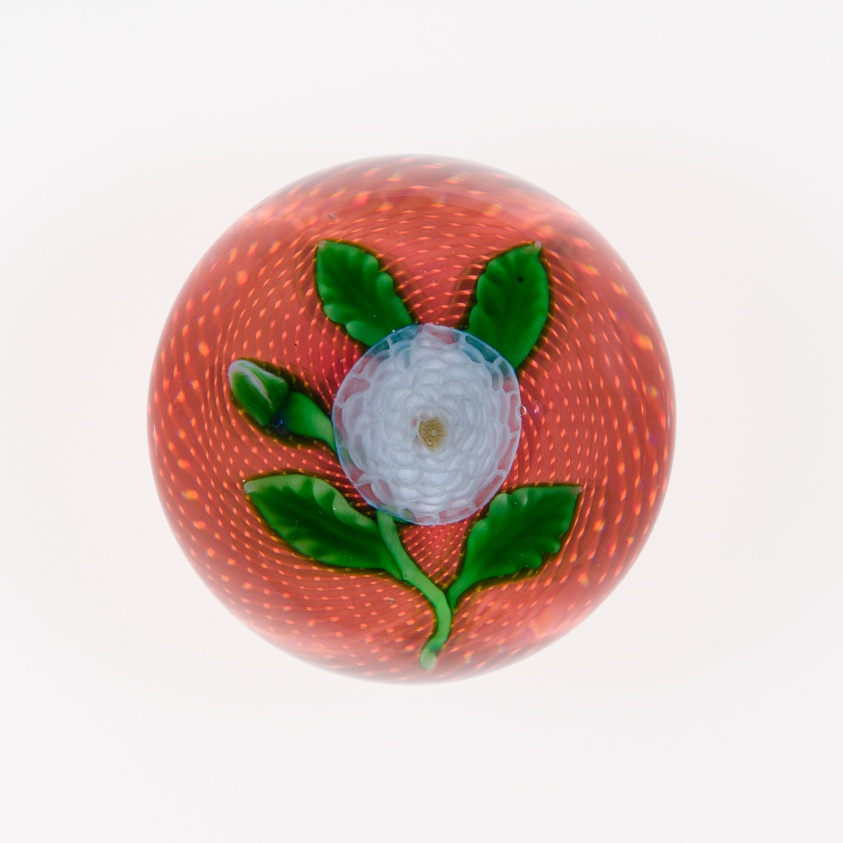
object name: Glass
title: Paperweight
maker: Saint-Louis Glassworks (Cristalleries de Saint-Louis); Lorraine, France, founded 1586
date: c. 1848–55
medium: Glass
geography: Saint-Louis-lès-Bitche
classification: paperweight; glass